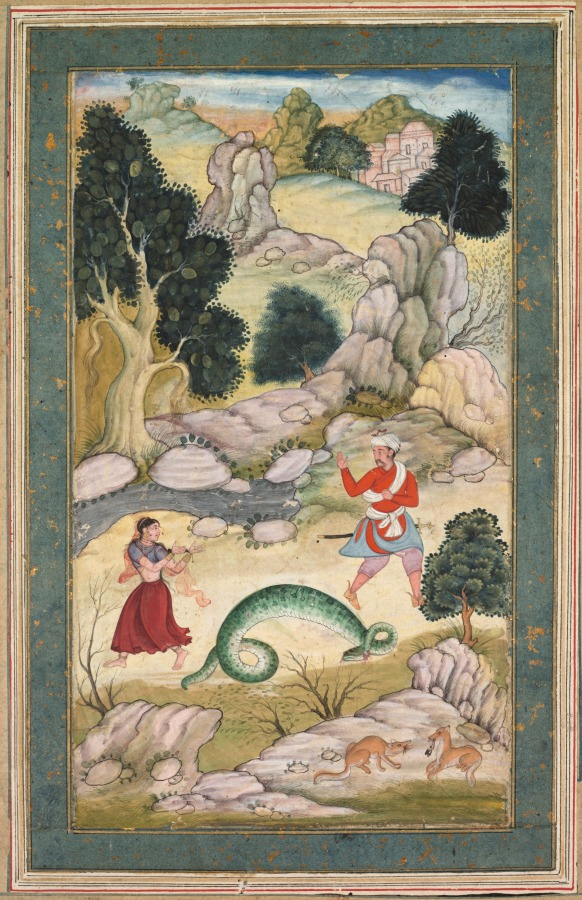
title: Lovers Parting, Page from a Book of Fables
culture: Northern India, Mughal court, 16th century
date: c. 1590–95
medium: Gum tempera and gold on paper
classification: Painting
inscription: Banyavati inscription in Devenagari script in left margin describing the subject of the miniature: 'We failed to understand each other when we were together, the understanding in that respect may come to us on being separated".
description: The lovers have met in a remote wilderness location, away from the city shown in the distance. However, their affair has run its course, and they decide to part ways, each walking in opposite directions through an ominous landscape, where strange rock formations and an oversized serpent-slain by foxes gnawing on its innards-lend a sense of foreboding. As Mughal court painting developed into the last decades of the 16th century, artists began using increasingly muted colors and gentler shading techniques than they did in the more robust Adventures of Hamza at the left. The omission of a light source and shadows adds to a timeless, otherworldly impression to the landscape.